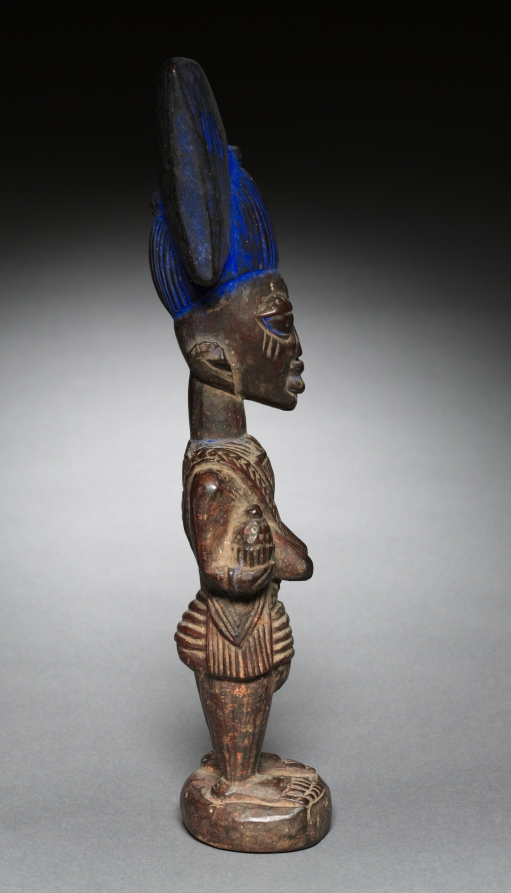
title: Shrine Figure for Sàngó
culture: Africa, West Africa, Nigeria, Yorùbá-style maker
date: c. 1910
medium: Wood, probably bluing, and organic material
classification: Sculpture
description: Sàngó is a king turned god in the Yorùbâ cosmology. One of the many òrìṣà—a god or divine spirit—that Yorùbá people can become devotees of and appeal to, Sàngó is often associated with lightning and thunder. The shape atop the female figure's head is the double-axe symbol of Sàngó. She wears a triangle-shaped amulet, waist beads, and bracelets, all signifying that she is a priestess. Standing on a base, rather than a handle, this figure was likely placed in a shrine dedicated to Sàngó.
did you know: The bright blue color on this sculpture is bluing, a powdered product used to brighten laundry.